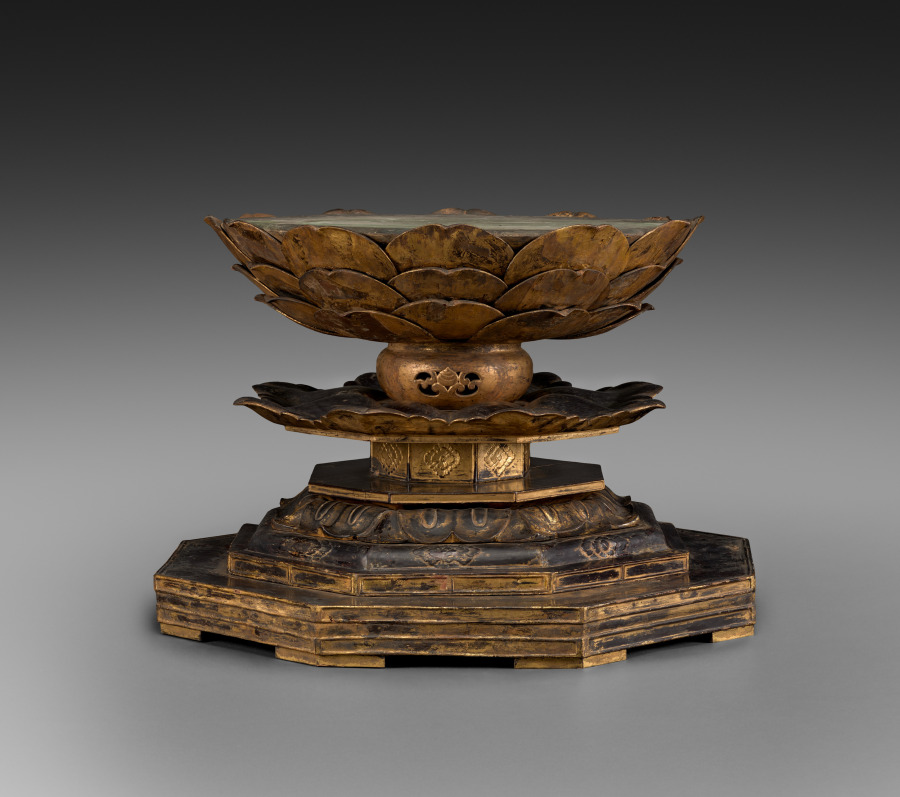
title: Seated Buddha (lotus pedestal)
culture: Japan, Heian period (794–1185)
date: 1100s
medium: gilded wood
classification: Sculpture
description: Composed of a number of hollowed-out pieces of wood that were then covered with lacquer and gilding, this sculpture would have served as the principal image of worship in a Buddhist temple hall. The Buddha Yakushi resides in the Lapis Lazuli Paradise of the East, and heals all diseases, including the ailment of ignorance. His left hand once held a medicine jar, while his right hand gestures reassurance. Seated on a lotus pedestal and backed by a mandorla and halo, the Buddha may have once been flanked by the bodhisattvas of the Sun and Moon, Nikkō and Gakkō, and protected by the Twelve Divine Generals, or Junishinshō.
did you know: This figure is depicted with a mudra, or hand gesture, that means "have no fear."